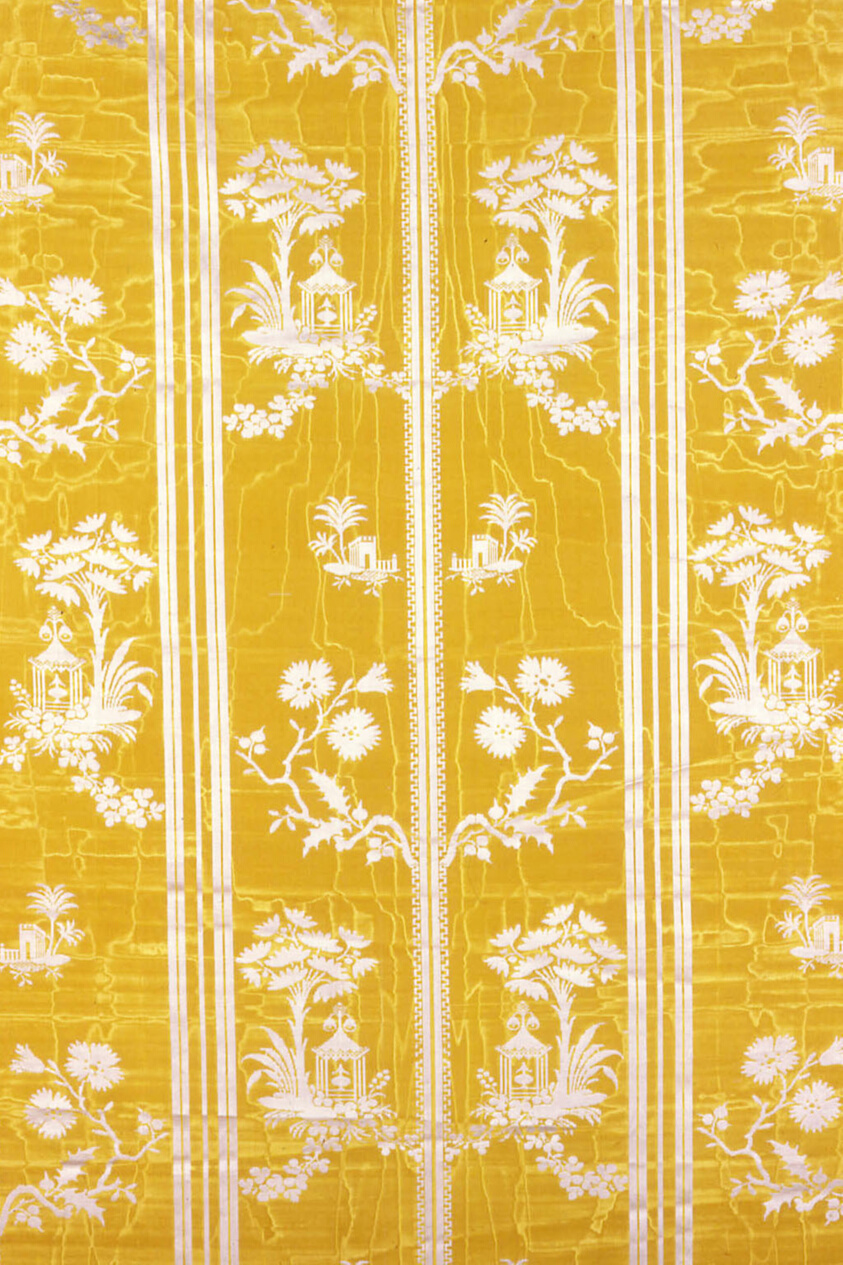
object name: Textile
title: Panel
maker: France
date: 1750/75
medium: Silk, satin weave with plain interlacings of secondary binding warps and ground wefts; moiré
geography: France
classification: textile; weaving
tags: Floating Gardens, flowers